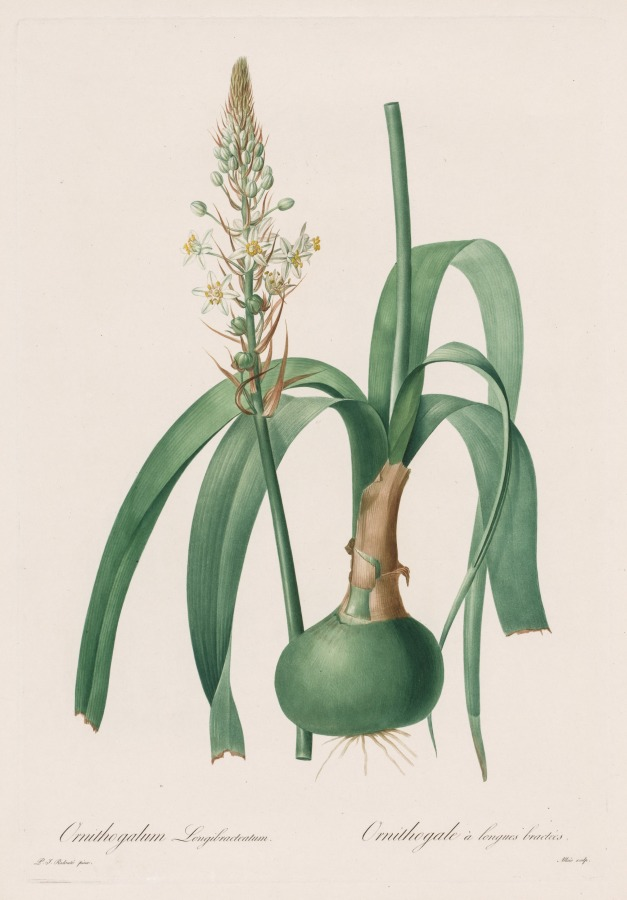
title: Les Liliacées: Ornithogalum longibracteatum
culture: France, 19th century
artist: Pierre-Joseph Redouté (French, 1759–1840)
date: 1802–16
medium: stipple and line engraving, with hand coloring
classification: Print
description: Although best known for Les Roses, perhaps Redouté’s most beautiful work is Les Liliacées, which is devoted to the lily family—plants that grow from bulbs, corms, or tubers.